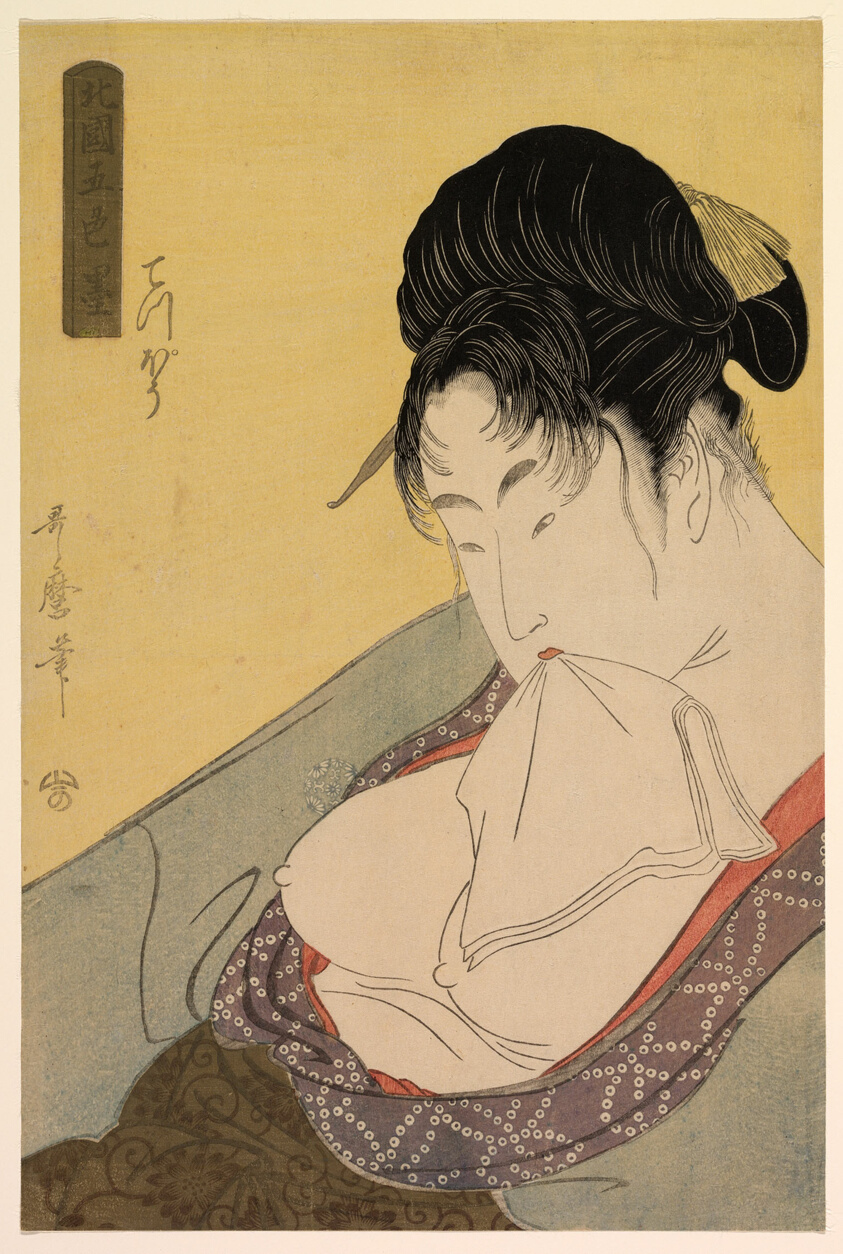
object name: Print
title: A Low Class Prostitute (Gun [teppo]), from the series “Five Shades of Ink in the Northern Quarter" ("Hokkoku goshiki-zumi")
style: Japanese (culture or style)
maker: Kitagawa Utamaro 喜多川 歌麿; Japanese, 1753 (?)-1806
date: c. 1794/95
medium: Color woodblock print; oban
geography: Japan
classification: woodblock print; print; asian art